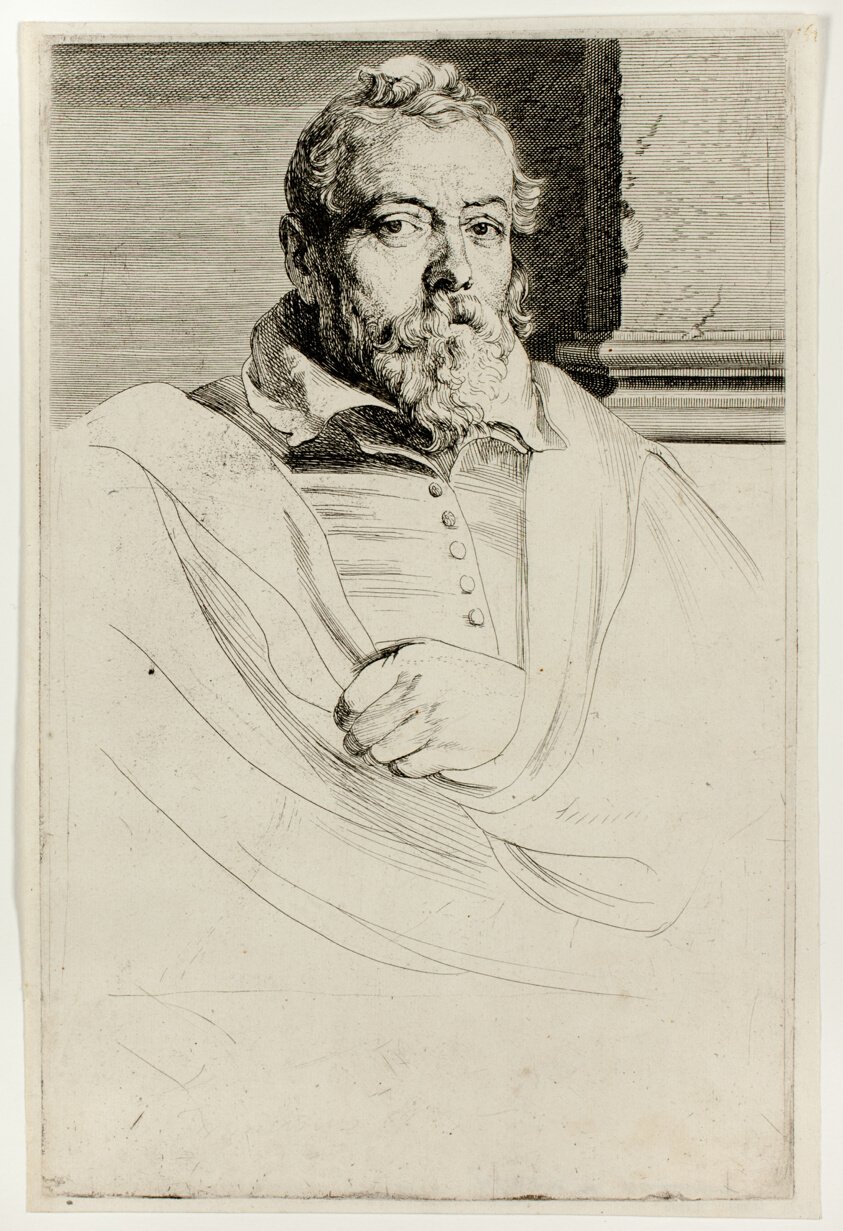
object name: Print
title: Frans Francken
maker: Anthony van Dyck (Flemish, 1599-1641)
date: 1630/33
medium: Etching and engraving in black on ivory laid paper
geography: Flanders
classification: etching; print; prints and drawing